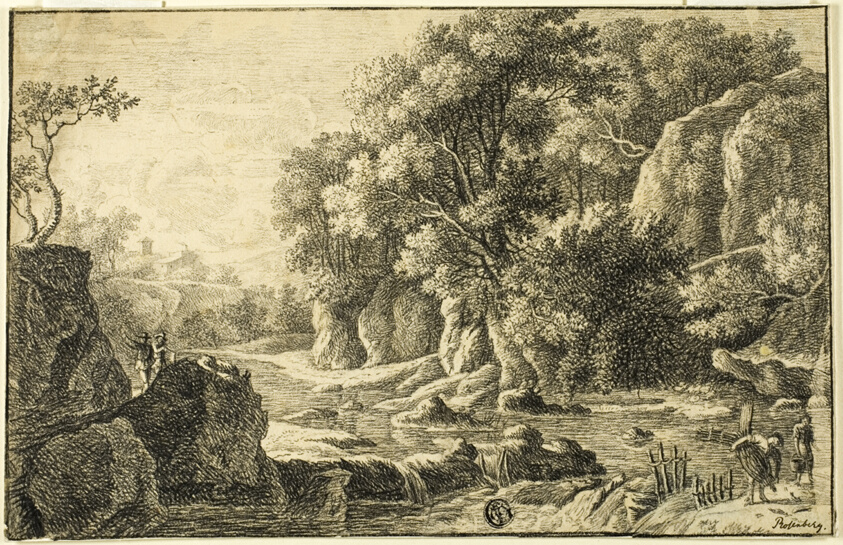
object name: Drawing and Watercolor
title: River Landscape with Figures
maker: George Frederick Rosenberg (English, 1825-1870)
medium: Black chalk on buff wove paper, laid down on ivory wove paper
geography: England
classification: chalk; drawings (visual works); prints and drawing